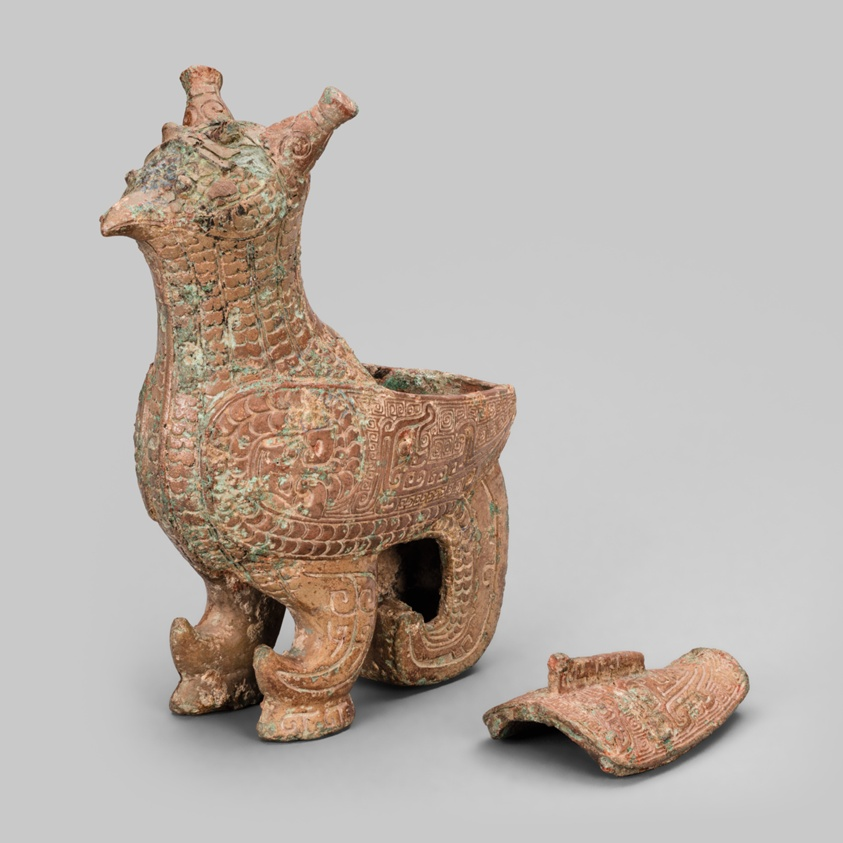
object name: Vessel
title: Bird-Shaped Container (zun)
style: Chinese (culture or style)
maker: China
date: Late Shang dynasty (13th century–1046 B.C.)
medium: Bronze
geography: China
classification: vessel; bronze; vessel for serving drinks; metal; asian art